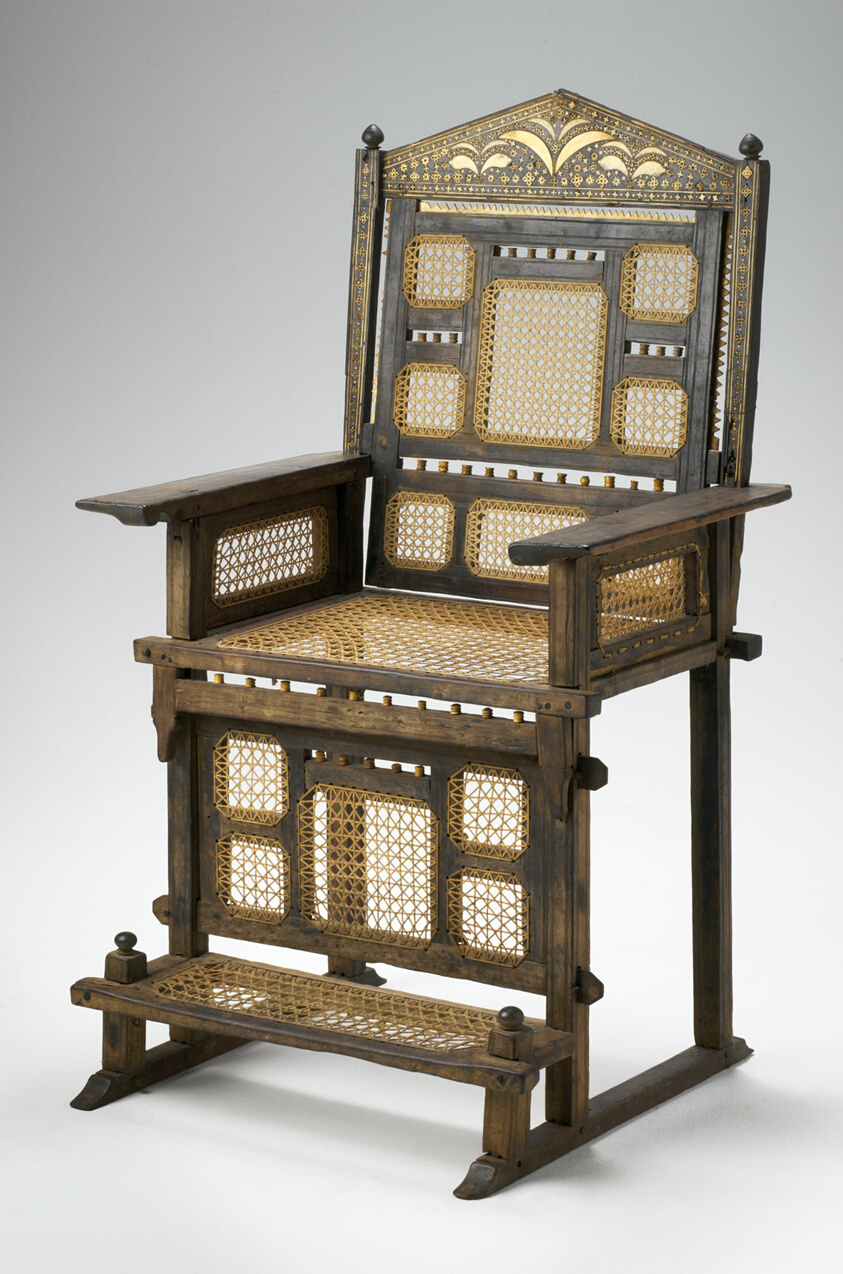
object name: Furniture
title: Chair (Kiti Cha Enzi)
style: swahili, Arts of Africa, 19th century, african Art, Eastern and Southern Africa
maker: Swahili; Lamu, Kenya; Eastern and Southern Africa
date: 19th century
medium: Wood, ivory, and cotton fiber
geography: Kenya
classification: chair; ivory; cotton; wood; arts of Africa; african art; furniture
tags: plant-derived motif